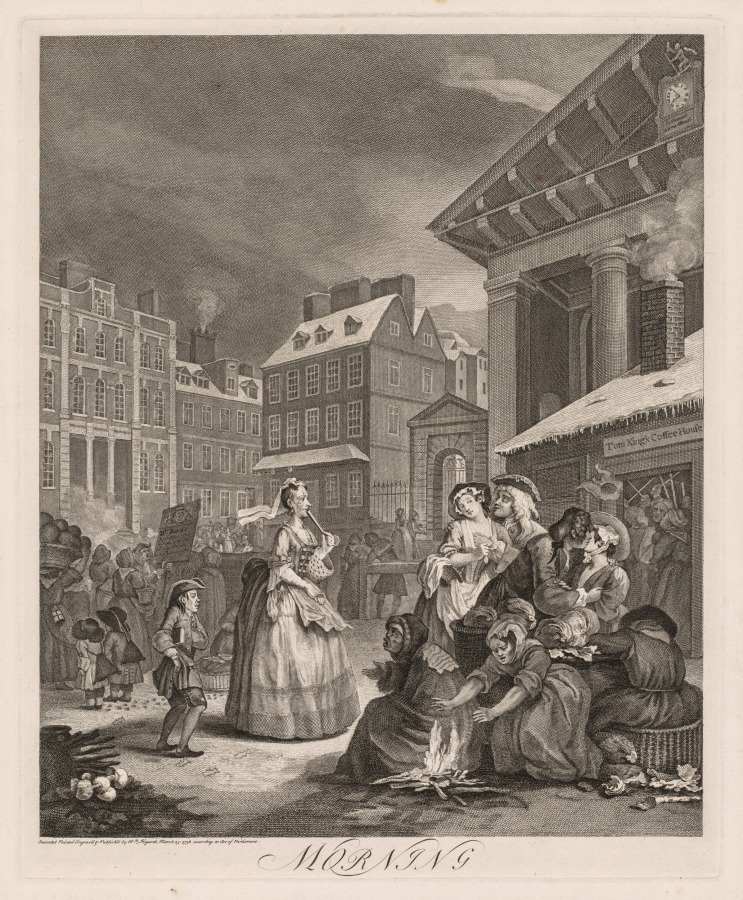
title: The Four Times of Day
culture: England, 18th century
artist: William Hogarth (British, 1697–1764)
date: 1738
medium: engraving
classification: Print